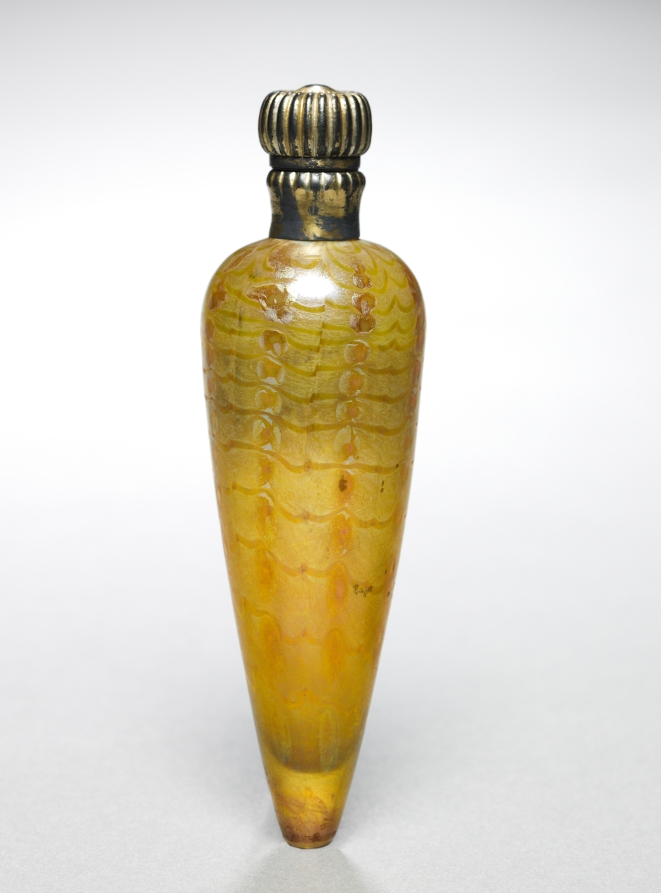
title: Perfume Bottle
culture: America, early 20th Century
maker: Tiffany Studios (United States, New York, 1902–32)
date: c. 1905–10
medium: favrile glass, gilt metal cover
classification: Glass